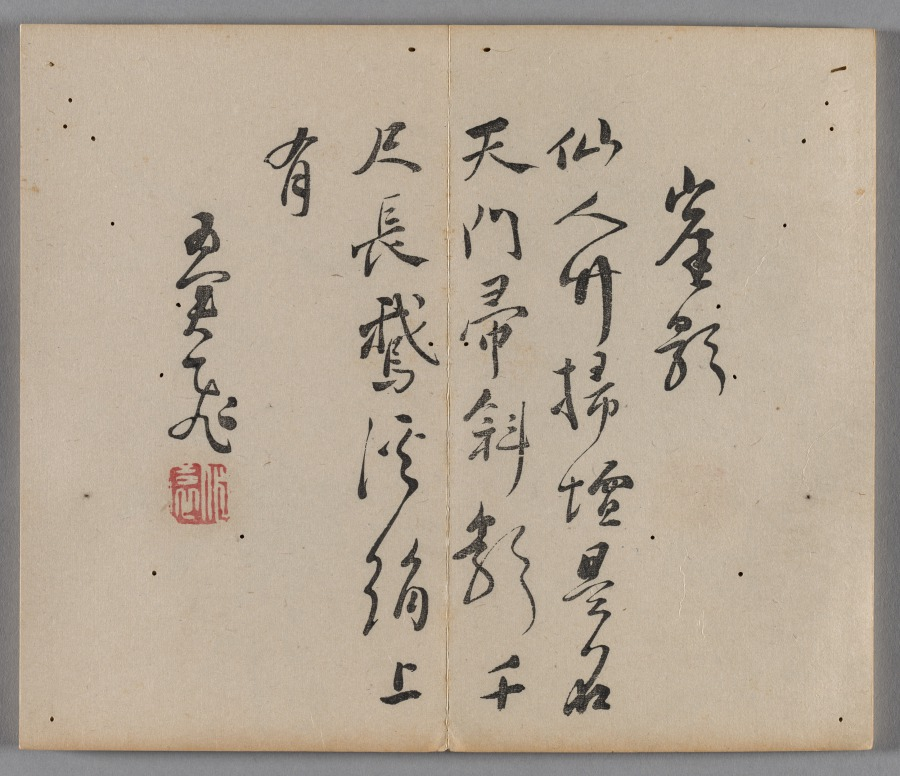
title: Ten Bamboo Studio Painting and Calligraphy Handbook (Shizhuzhai shuhua pu): Bamboo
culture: China, Qing dynasty (1644-1911)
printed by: Hu Zhengyan (Chinese, c. 1584–1674)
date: 1633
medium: Woodblock-printed book; ink and colors on paper; first edition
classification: Print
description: Color printing reached a level of perfection in the early 1600s, as seen in this Ten Bamboo Studio Collection of Calligraphy and Painting and the Mustard Seed Garden Manual of Painting (printed 1679 and 1701). The painterly quality, precision in registering (aligning) the woodblocks, and harmonious colors made them the most successful color print editions in Chinese history. Both editions were printed and compiled in Nanjing, spread nationwide, and had a great impact on the arts in Japan and Korea.